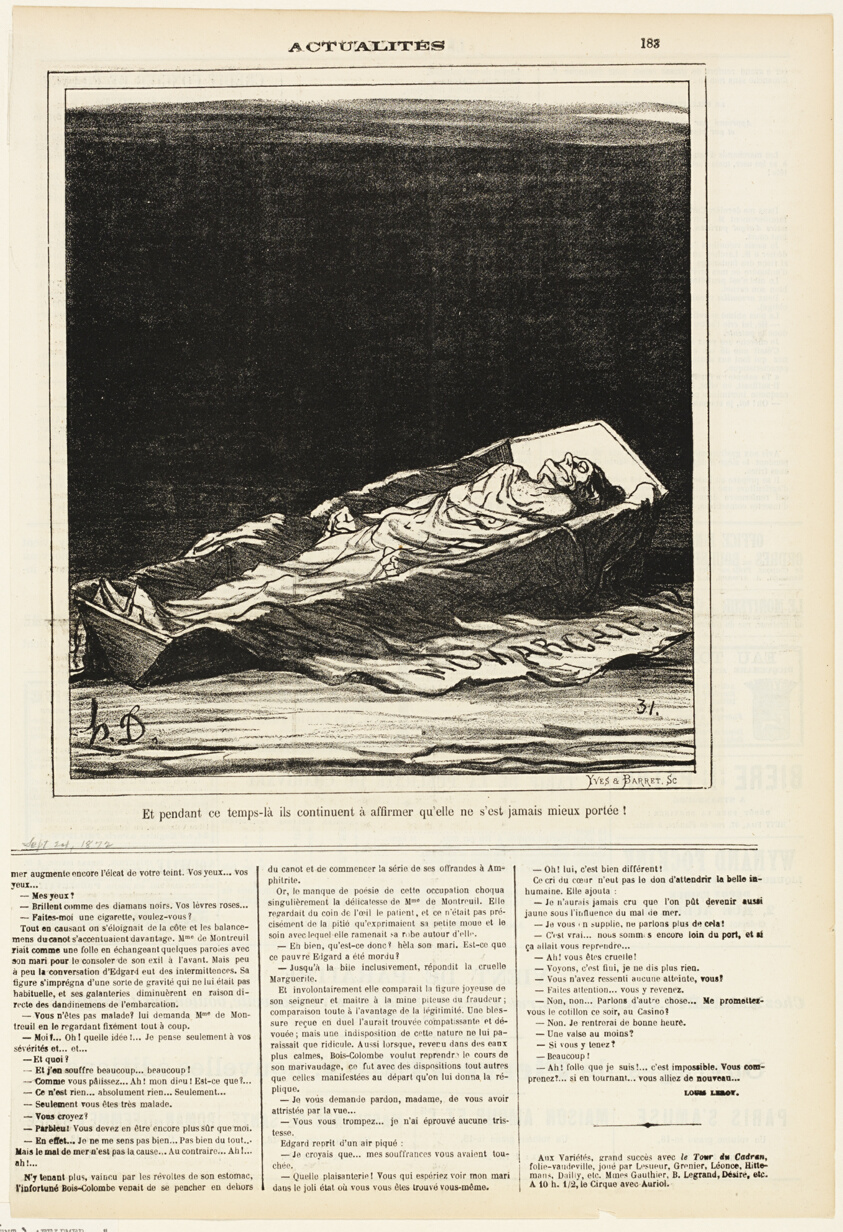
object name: Print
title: Meanwhile They Keep on Insisting that She Has Never Been Better, plate 183 from Actualités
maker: Honoré Victorin Daumier; French, 1808-1879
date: 1872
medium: Lithograph in black on white wove paper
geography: France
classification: lithograph; print; prints and drawing